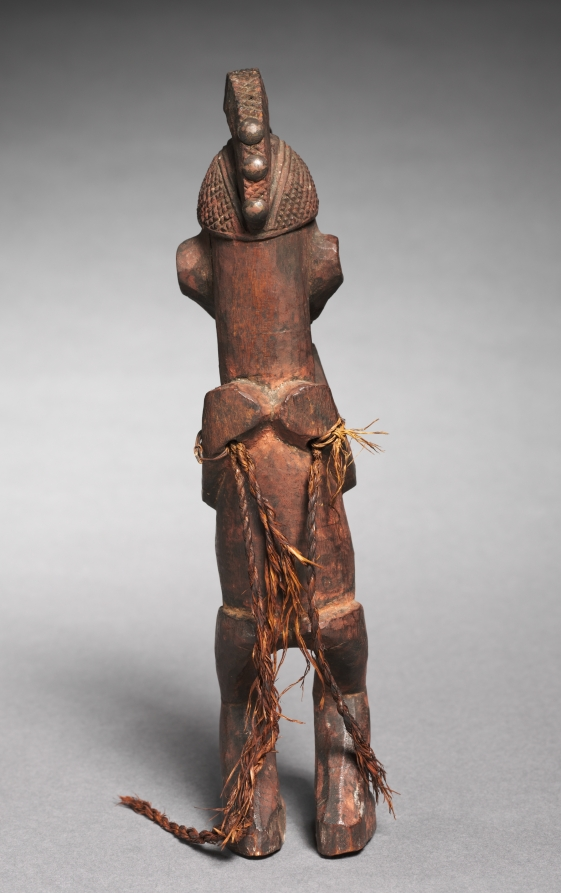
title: Male Figure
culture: Central Africa, Democratic Republic of the Congo, Suku, early 20th century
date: early 1900s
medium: Wood, upholstery studs, and plant fiber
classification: Sculpture